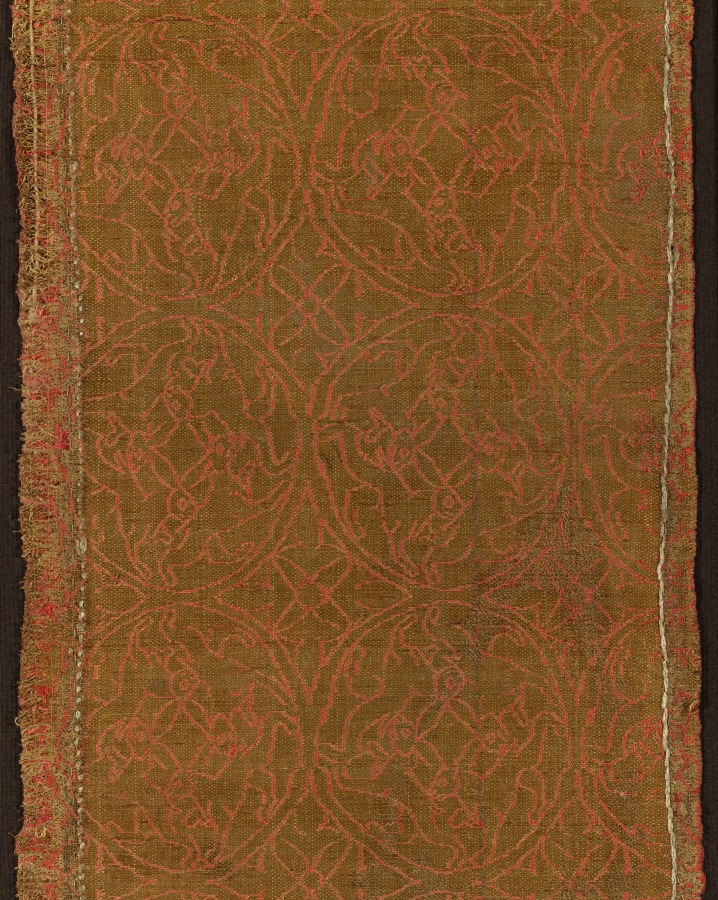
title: Cloth of Gold with Rabbit Wheels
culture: Eastern Iran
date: c. 1225–50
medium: Silk and gold thread: lampas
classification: Textile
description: Cloth of Gold with Rabbit Wheels Lampas; silk and gold thread Eastern Iranian world, about 1225-1260 The Cleveland Museum of Art, John L. Severance Fund 1993.140 (Cat. no. 45) The lavish amount of gold-used here for both the pattern and the background-reflects the extravagant taste of the Mongols. Known as "cloths of gold," such textiles were primarily woven for the official costumes of the Mongol court. Repeated roundels enclose four rabbits that share two pairs of ears and run in a circle. This motif, known as an animal wheel, is very ancient in Asia. Rabbits are commonly found on eastern Iranian metalwork dating from around 1200. Although the Mongol conquest of the Eastern Iranian world had taken place (1220-22), traditional silk patterns continued to be produced through the mid-1200s.